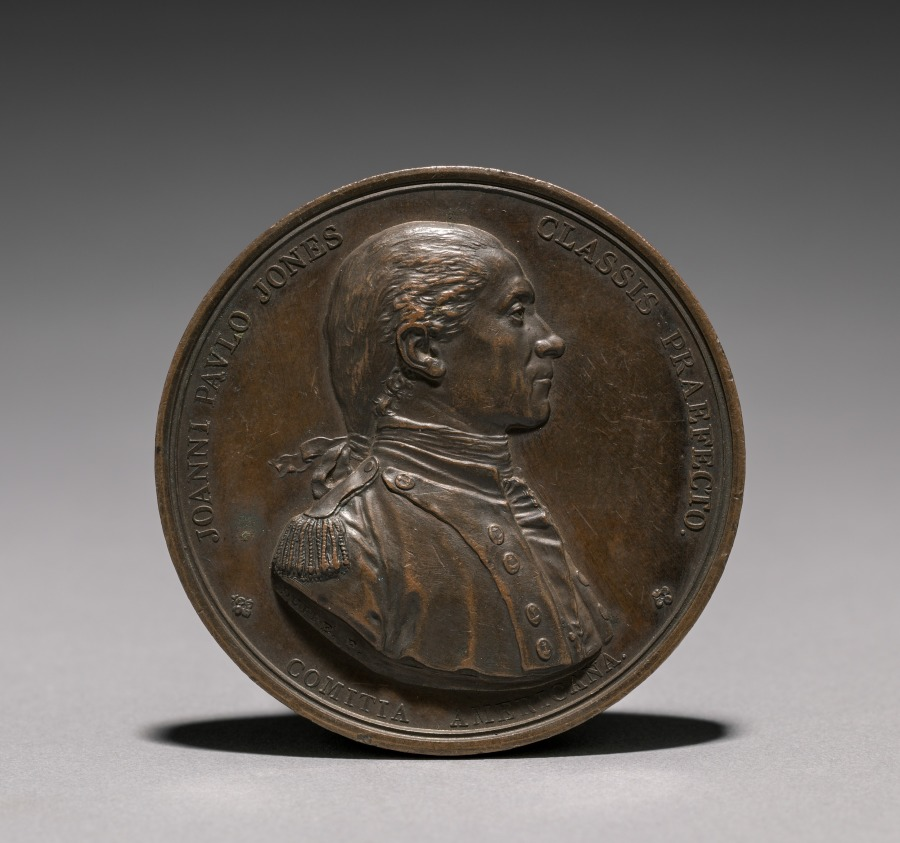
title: Medal: John Paul Jones (obverse)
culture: France, 19th century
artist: Jules Dupré (French, 1811–1889)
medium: bronze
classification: Metalwork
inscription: Joanni Pavlo Jones classis Praefecto. Comita Americana.